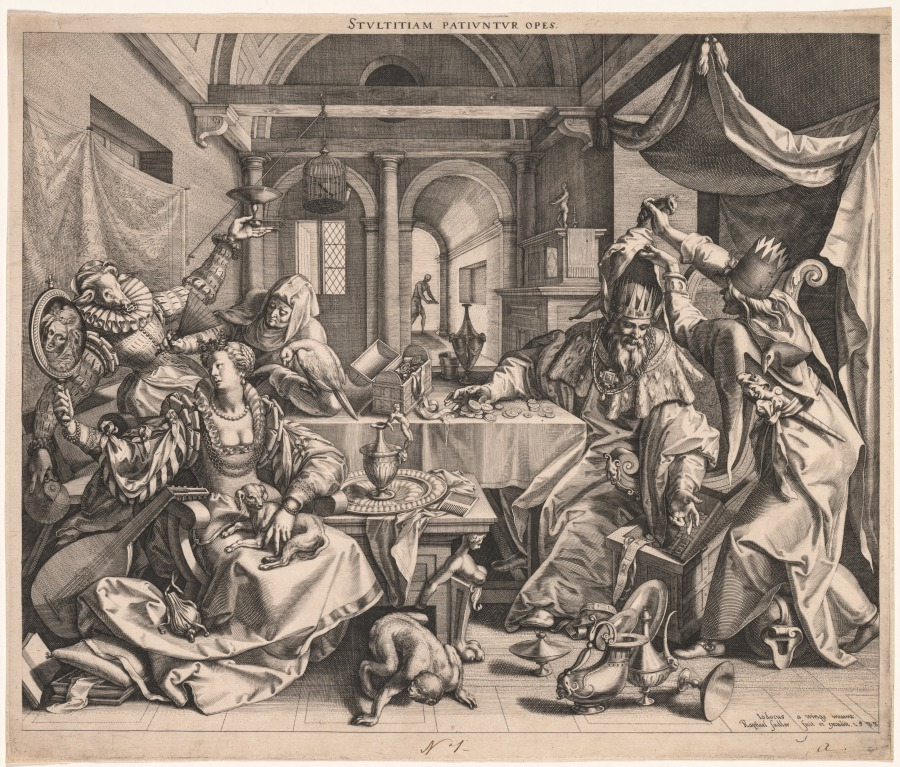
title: Stultitiam patiuntur opes (Wealth permits Stupidity), or, Allegory of Wealth, Lust, and Stupidity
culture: Flanders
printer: Raphael Sadeler (Flemish, 1560/61–1628/32)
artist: after Joos Van Winghe (Flemish, 1544–1603)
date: 1588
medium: Engraving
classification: Print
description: In this pointed visual allegory, a king who personifies wealth counts his money at a table while a jester places a fool’s hat over his head. His female counterpart, distracted by her aged reflection in a mirror, displays her vanity in her luxurious clothing, lap dog, and hangers-on: flattery fans her, and stupidity, with a boar’s head, serves her food and drink. Such allegories were meant to both entertain while cautioning the viewer to question their own relationship to wealth.